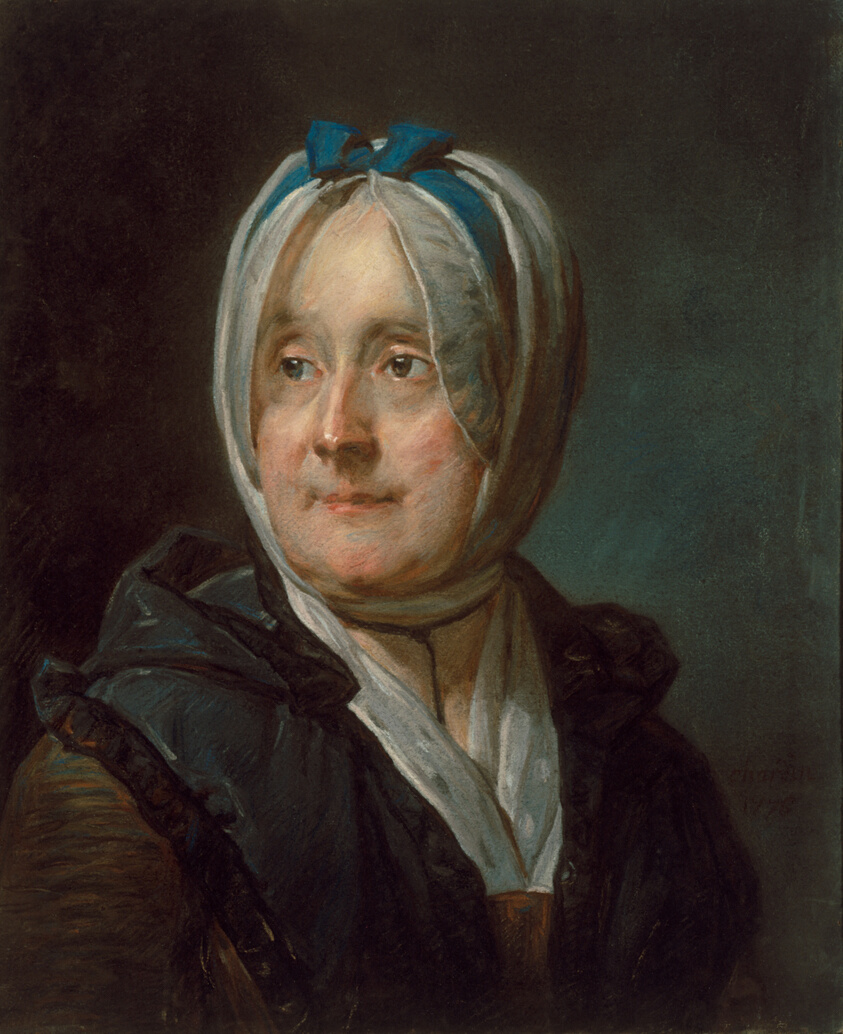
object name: Drawing and Watercolor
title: Portrait of Madame Chardin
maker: Jean Siméon Chardin; French, 1699-1779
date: 1776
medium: Pastel on blue paper mounted on canvas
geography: France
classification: pastel; drawings (visual works); prints and drawing